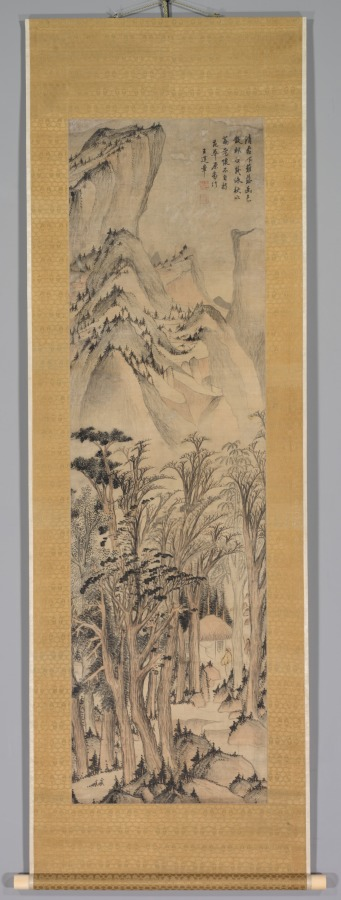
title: Solitary Colors of the Autumn Woods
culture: China, Ming dynasty (1368–1644)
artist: Wang Jianzhang (Chinese, active 1621–1662)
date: first half 1600s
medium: hanging scroll; ink and color on satin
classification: Painting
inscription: Artist's inscription, signature, and 2 seals: Cold frost falls on the fences,/ Solitary colors scatter the maples./ Reciting the chapter of "The Autumn Water,"/ I cannot still the emotion in my old heart. After the style of Fan Hua-yüan [Fan Kuan], Wang Chien-chang . [seals] Wang shih chih yin; Chien-chang. trans. LYSL/HK/WKH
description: Two gentlemen stand outside a thatched hut in a dense forest; some trees have bare branches indicating that the season is early autumn. Wang Jianzhang’s inscribed poem refers to a chapter called “Autumn Water” from Zhuangzi, a famous Daoist text written in the 3rd century BC: "Cold frost falls on the fences, / Solitary colors scatter the maples. / Reciting the chapter of “The Autumn Water,” / I cannot still the emotion in my old heart." Wang Jianzhang lived through the collapse of the Ming dynasty (1368–1644) and the rise of the Qing dynasty (1644–1911), when China was governed by the Manchus, an ethnic people from Manchuria who were traditionally viewed as “barbarians” by the Chinese. The poetic reference to Zhuangzi’s “Autumn Water” seems to discreetly convey Wang’s feelings about his country being taken over. “Autumn Water” was about learning to take steps in the foreign way, but not acquiring a foreign tongue. Perhaps Wang was lamenting his conflicted situation. For survival he had to adapt to the new political and social climate, while still trying to maintain his own identity and Chinese traditions.